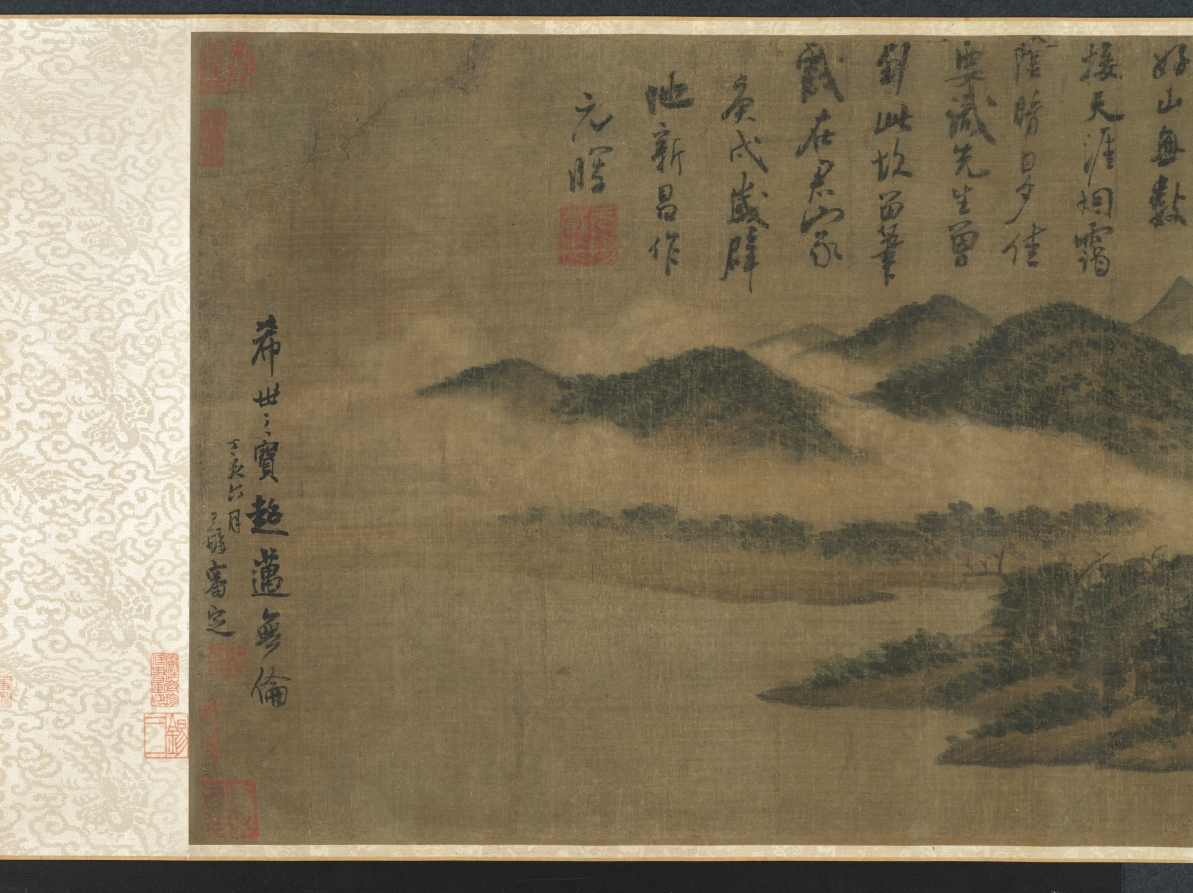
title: Cloudy Mountains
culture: China, Southern Song dynasty (1127-1279)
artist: Mi Youren (Chinese, 1072–1151)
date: 1130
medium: Handscroll; ink and color on silk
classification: Painting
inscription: 好山無數接天涯，烟靄陰晴日夕佳。/ 要識先生會到此，故留筆戲在君家。/ 庚戍歲，辟地新昌作。元暉。/ [seal] 元暉戲作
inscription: [Seal] 安陽孫氏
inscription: [Seal] 畢瀧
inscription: [Seal] 成親王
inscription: [Seal] 永瑆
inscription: [Seal] 錫三 appears twice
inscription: [Seal] 養性齋珍藏書畫印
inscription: [Seal] 芷陔審定真跡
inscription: [Seal] 玉簡齋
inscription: 2 colophons (1 dated 1650), inscription dated 1647, and 2 seals of Wang To (1592–1652)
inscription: 1 colophon, dated second month of the gengyin year 庚寅 (1650), and 2 seals of Chen Kuang 陳爌 (1646 jinshi degree)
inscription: 7 seals unidentified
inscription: A separate scroll containing six colophons on Cloudy Mountains exists; the inscribers are Luo Zhenyu 羅振玉 (1866–1940), Naito Torajiro 內藤虎次郎 (1866–1934), Nagao Ko 長尾甲 (1864–1942), and Wu Changshuo 吳昌碩 (1844–1927). Naito Torajiro alone wrote three colophons.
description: Cloudy Mountains captures the view of a lush and misty riverscape, an impression of Mi Youren’s new environment, painted in a moment of peace. With the fall of the Northern Song dynasty in 1127 upon the Jurchen’s military invasion, Mi Youren fled south across the Yangzi River. In 1130, he had reached Xinchang in Zhejiang province and thanked his host with this painting for having given him shelter. Mi Youren was the oldest son of the art critic Mi Fu (1051– 1107); both developed a distinct style of mountain scenery by accumulating wet ink dots that create a hazy atmosphere.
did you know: This scroll is one of the museum’s earliest dated Chinese paintings.